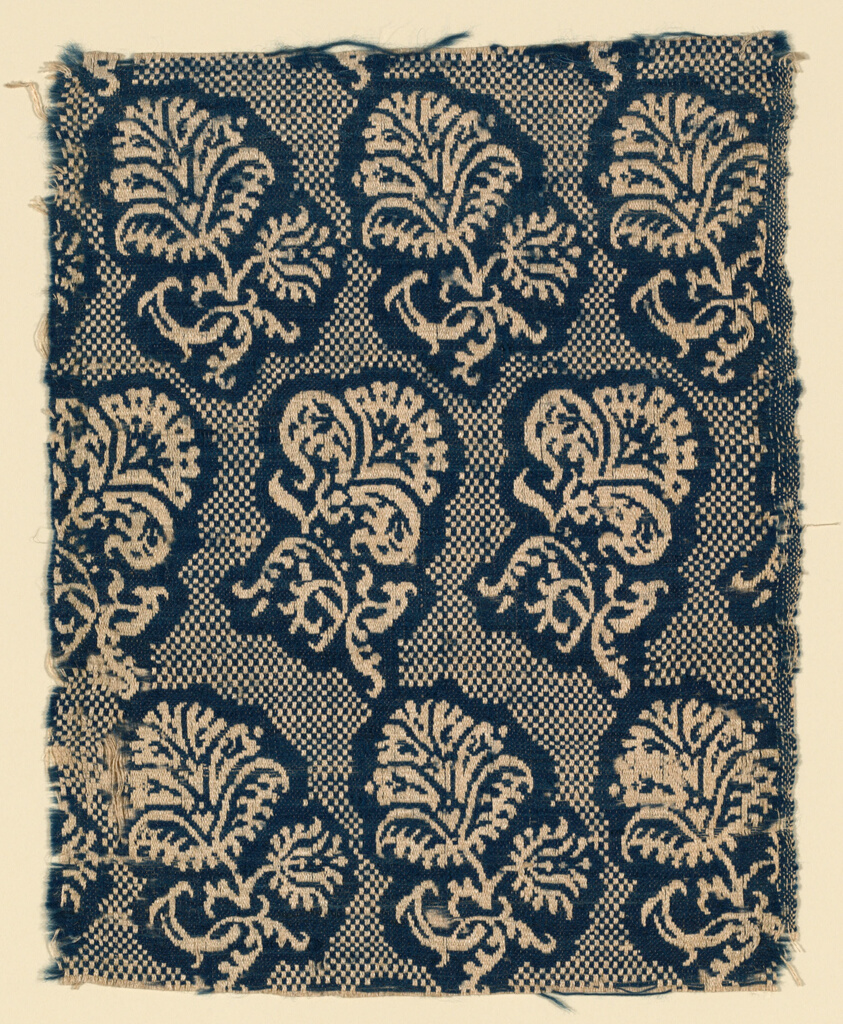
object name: Textile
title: Fragment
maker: Europe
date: 17th century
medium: Linen and wool, plain weave; tied and free double cloth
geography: Europe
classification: textile; weaving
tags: flowers